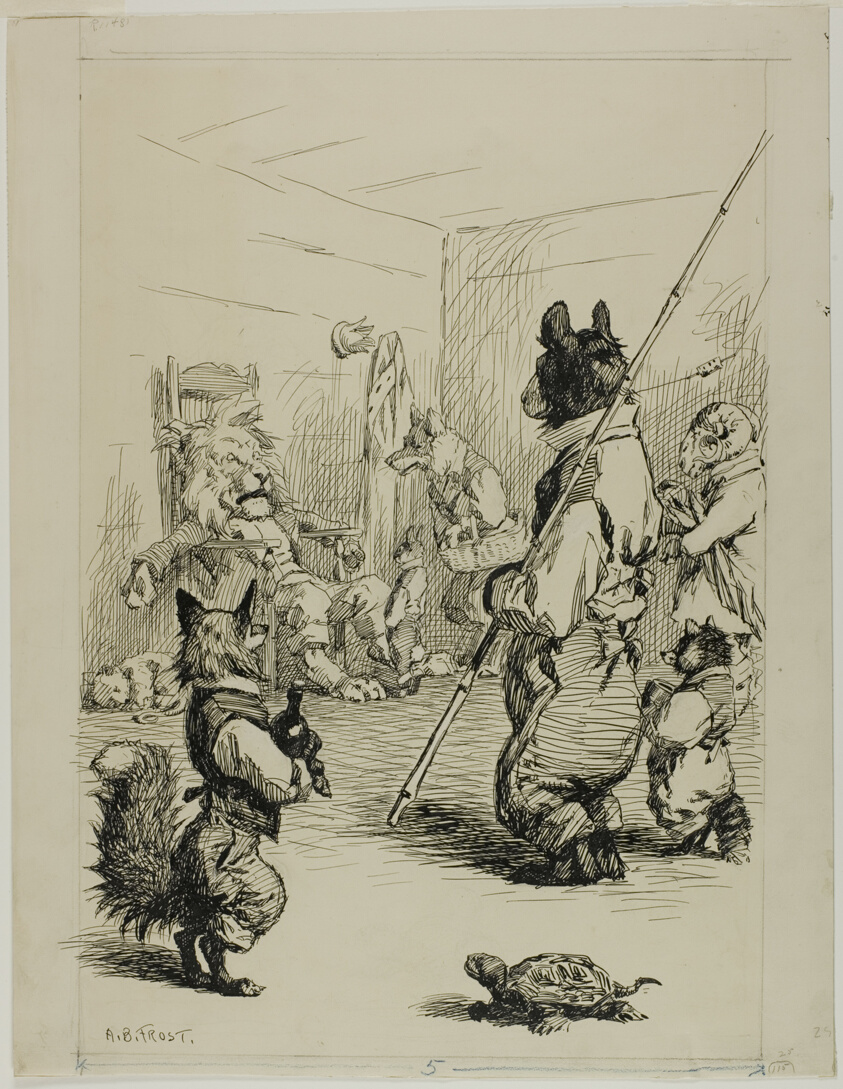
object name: Drawing and Watercolor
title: De King Im Sit Right Flat in a Chair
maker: Arthur Burdett Frost, Sr. (American, 1851-1928)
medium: Pen and black ink, over graphite, on ivory wove paper, laid down on ivory wove card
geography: United States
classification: pen and ink drawings; drawings (visual works); prints and drawing